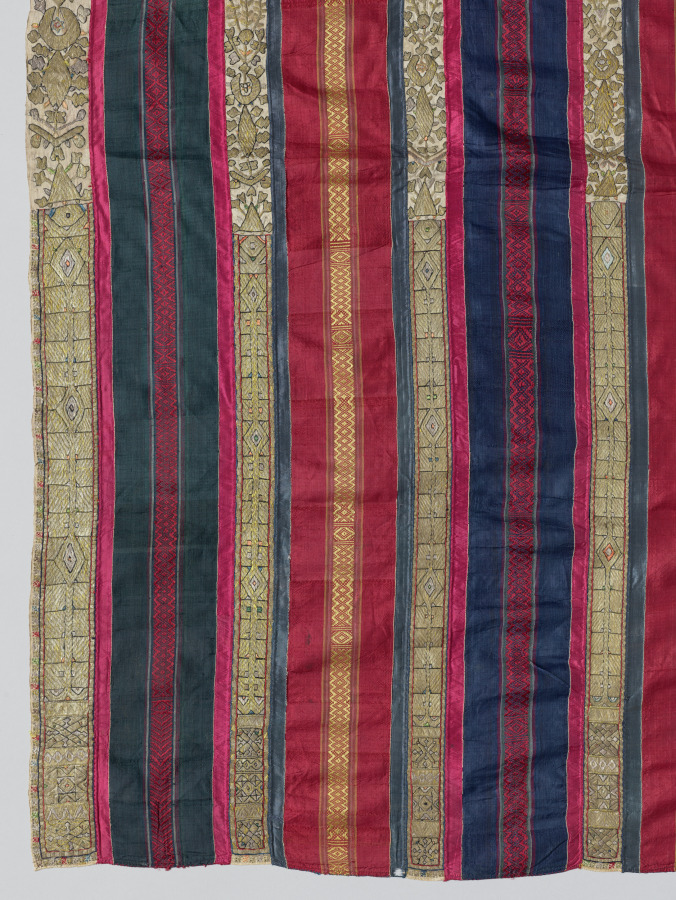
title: Curtain (one of a pair)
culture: Africa, North Africa, Tunisia, Djerba, Tunisian weaver(s) and embroiderer(s)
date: 1600s–1700s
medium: Silk, linen, metal, and dye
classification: Embroidery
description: One of a pair, this curtain displays colorful silk bands with woven geometric motifs, and cream bands with gold-embroidered plants, birds, six-pointed stars, and the khamsah (خمسة), an open five-fingered hand. Birds and the tree of life were popular good luck or fertility symbols linked to marriage. This curtain’s cosmopolitan motifs would have resonated with Jews, Muslims, and Christians alike, reflecting its creation on multiethnic and multireligious Djerba, an island off the Tunisian coast. There, both goldsmithing and gold thread embroidery were done by Jewish artisans (male and female, respectively). The fine materials suggest this curtain once hung in a wealthy home or for special occasions; interior wall hangings were typically made from rough wool.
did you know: When first acquired over a century ago, this curtain had fringe at its lower end.